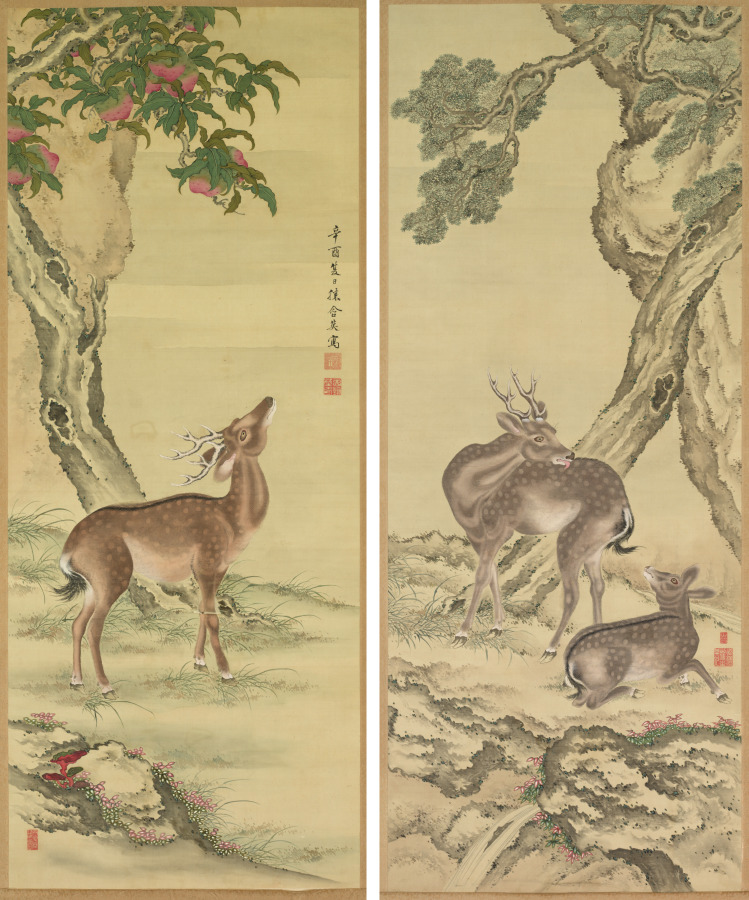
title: Symbols of Longevity: Deer under Peach and Pine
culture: Japan, Edo period (1615–1868)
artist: Toda Tadanaka (Japanese, 1761–1823)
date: 1801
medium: Pair of hanging scrolls; ink and color on silk (ivory roller ends)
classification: Painting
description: This pair of hanging scrolls is replete with images symbolizing longevity. Peaches, associated with immortality, hang in abundance from a tree in the left scroll, while pines, known for being eternally green, twist together in the right scroll. Beneath the trees stand two bucks, one of whom gazes at a doe seated on the ground as he licks his coat. Medicine made from deer antlers is said to promote health. Mushrooms, in bright red and green, seen in the left scroll, are said to confer immortality upon those who eat them, and the small waterfall in the right scroll speaks to the infinite flexibility and abundance flowing through life. Toda Tadanaka, the son of the ruler of Noto province and a military leader himself, trained with trained with Mori Ransai (1740-1801), a painter known for colorful bird-and-flower compositions in the style of Shen Nanping. The style is more generally referred to as the Nagasaki style, indicating the port city in which a number of Chinese painters were active in the Edo period (1615-1868).